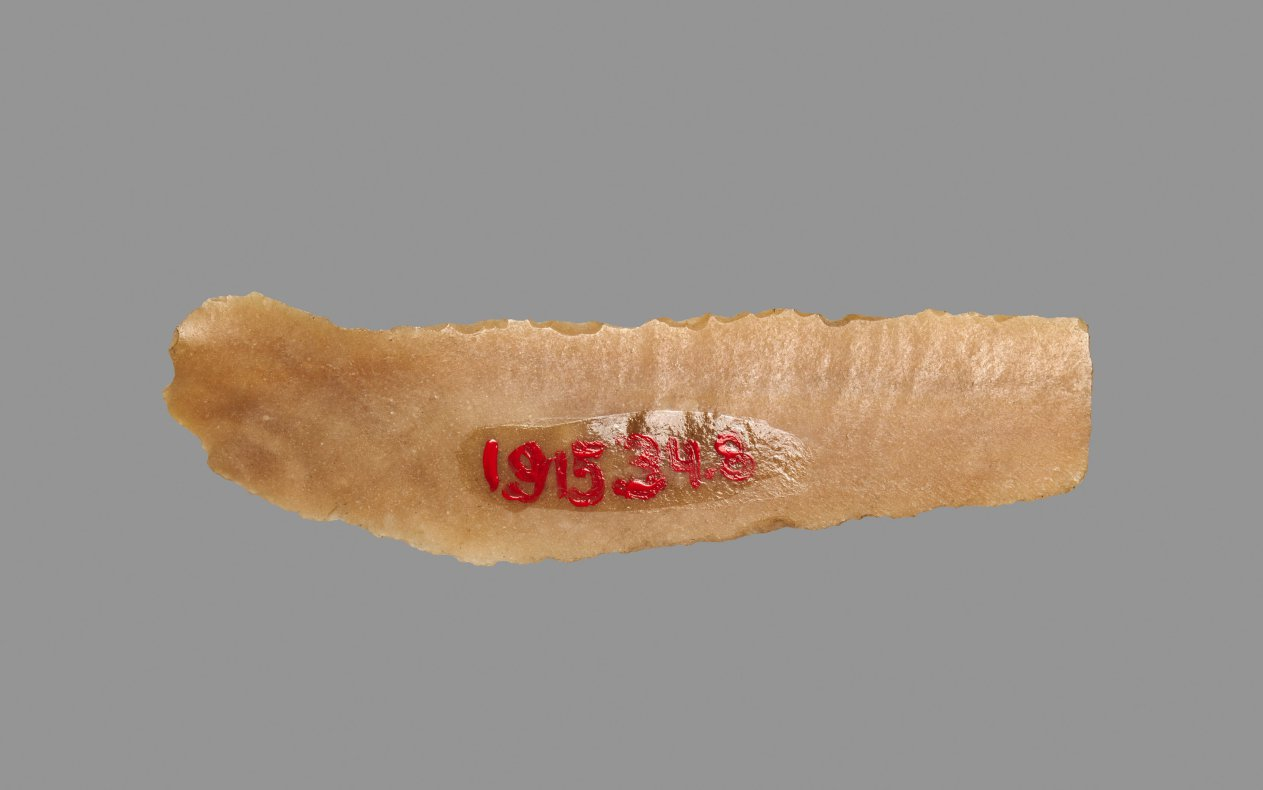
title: Sickle Blade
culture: Egypt, Middle Kingdom (2040–1648 BCE), Dynasty 12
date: 1980–1801 BCE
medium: flint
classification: Implements